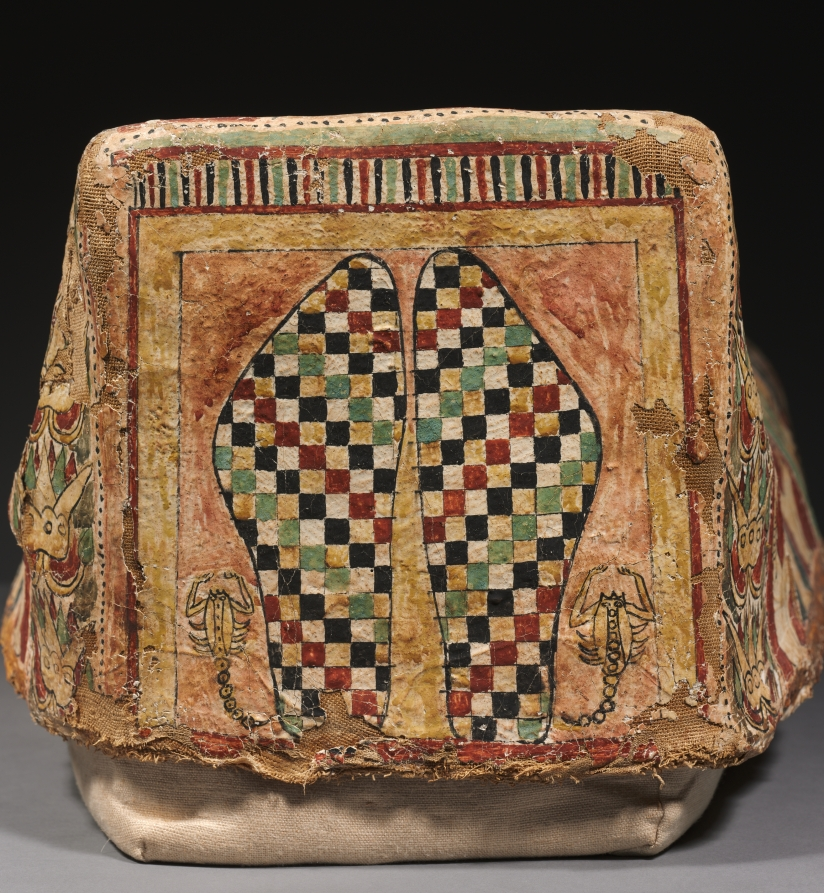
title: Cartonnage Mummy Case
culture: Egypt, Greco-Roman period (332 BCE–395 CE), Ptolemaic dynasty (305–30 BCE)–Roman empire (30 BCE–395 CE)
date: c. 50 BCE–50 CE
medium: cartonnage, painted and gilded, with glass inlays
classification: Funerary Equipment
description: This mummy case is made of cartonnage, a material similar to papier-mâché, but using layers of linen rather than paper. Cartonnage mummy cases such as these are contemporary with funerary portraits painted on wood or linen, although they present a very different appearance. The face, modeled in plaster, is bland and idealized, although the effect of the gilding and glass inlays is quite dazzling. The body is painted with traditional, age-old funerary motifs: the god Osiris, seated and mummiform; the fetish of Abydos, holy city of Osiris, flanked by standing deities (Thoth and Shu); a Horus falcon with outspread wings, and the bark of Sokar. Below these are the sandaled feet of the deceased. On the sides are rows of seated deities. On the top of the head are a winged scarab beetle flanked by Anubis jackals. On the foot are painted the soles of the deceased’s sandals, flanked by scorpions for protection.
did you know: This coffin is smaller and later in date than the other coffins in this gallery. It is made of cartonnage, which used layers of linen to create a material similar to papier-mâché. The painted portrait head displays the influence of Roman portraiture at this time and incorporates both gilding and glass inlays. Despite the fragile materials, this mummy case survived due to the very dry desert climate in which it was found.